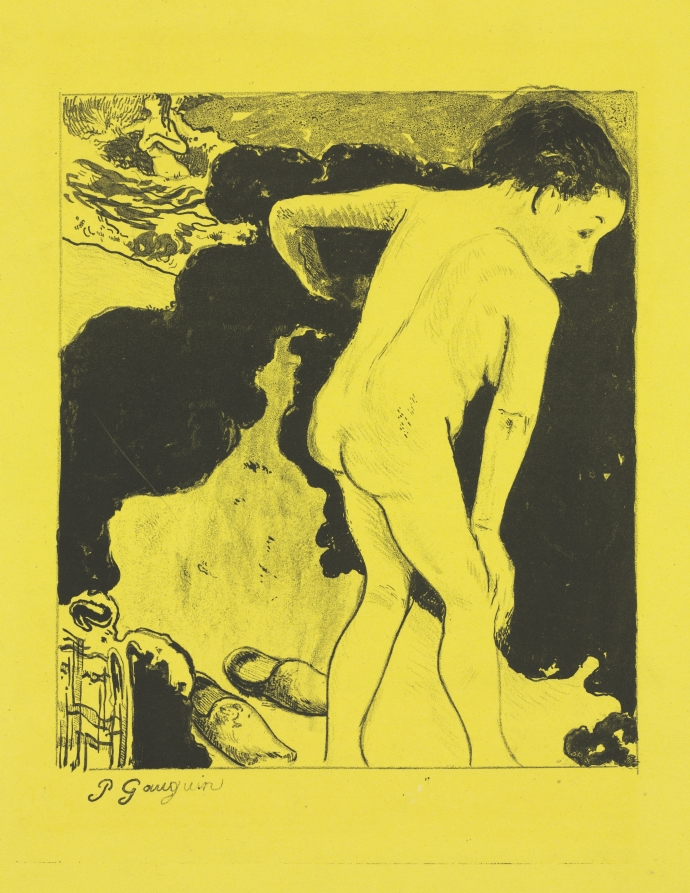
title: Volpini Suite: Breton Bathers (Baigneuses Bretonnes)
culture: France, 19th century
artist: Paul Gauguin (French, 1848–1903)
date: 1889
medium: zincograph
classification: Print